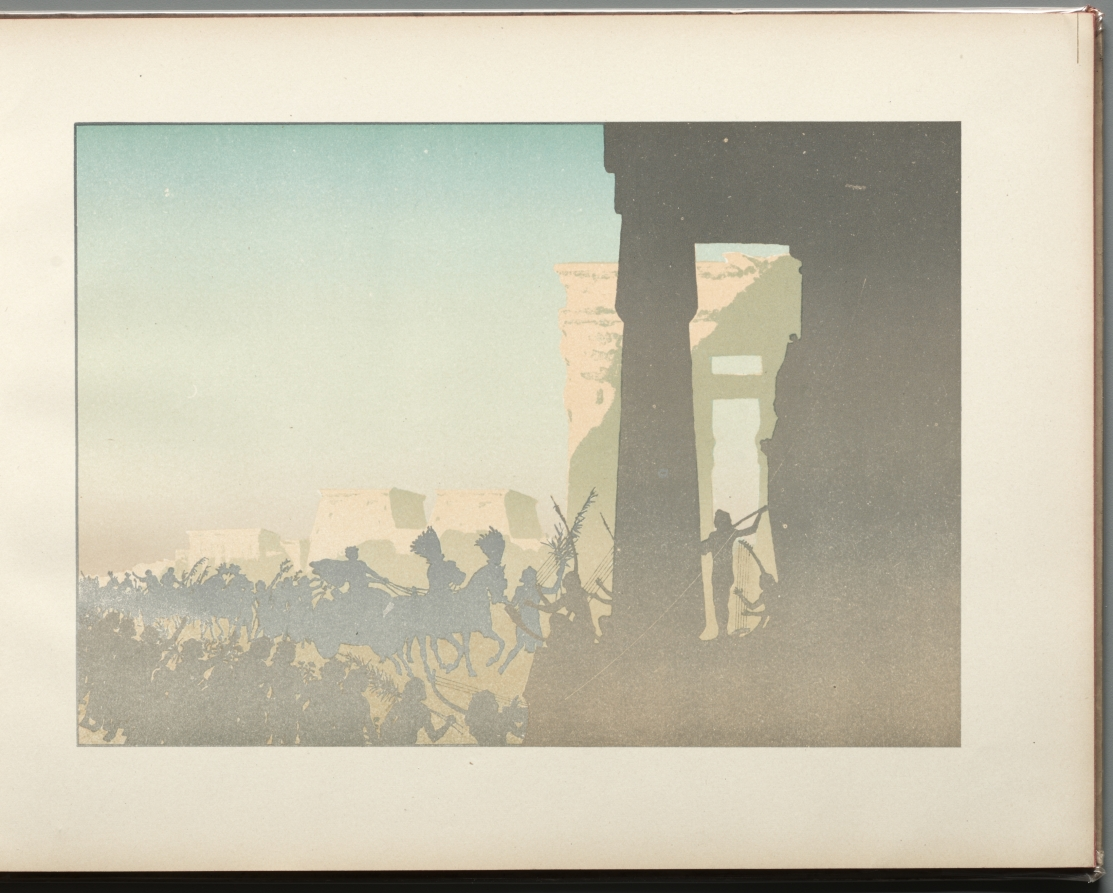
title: The Prodigal Son: page 23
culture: France, 19th century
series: Bound Volume illustrating the poetry and music of Georges Fragerolle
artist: Henri Rivière (French, 1864–1951)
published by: E. Flammarion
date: 1895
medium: 15 color lithographs in a bound volume illustrating the poetry and music of Georges Fragerolle: color lithograph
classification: Bound Volume